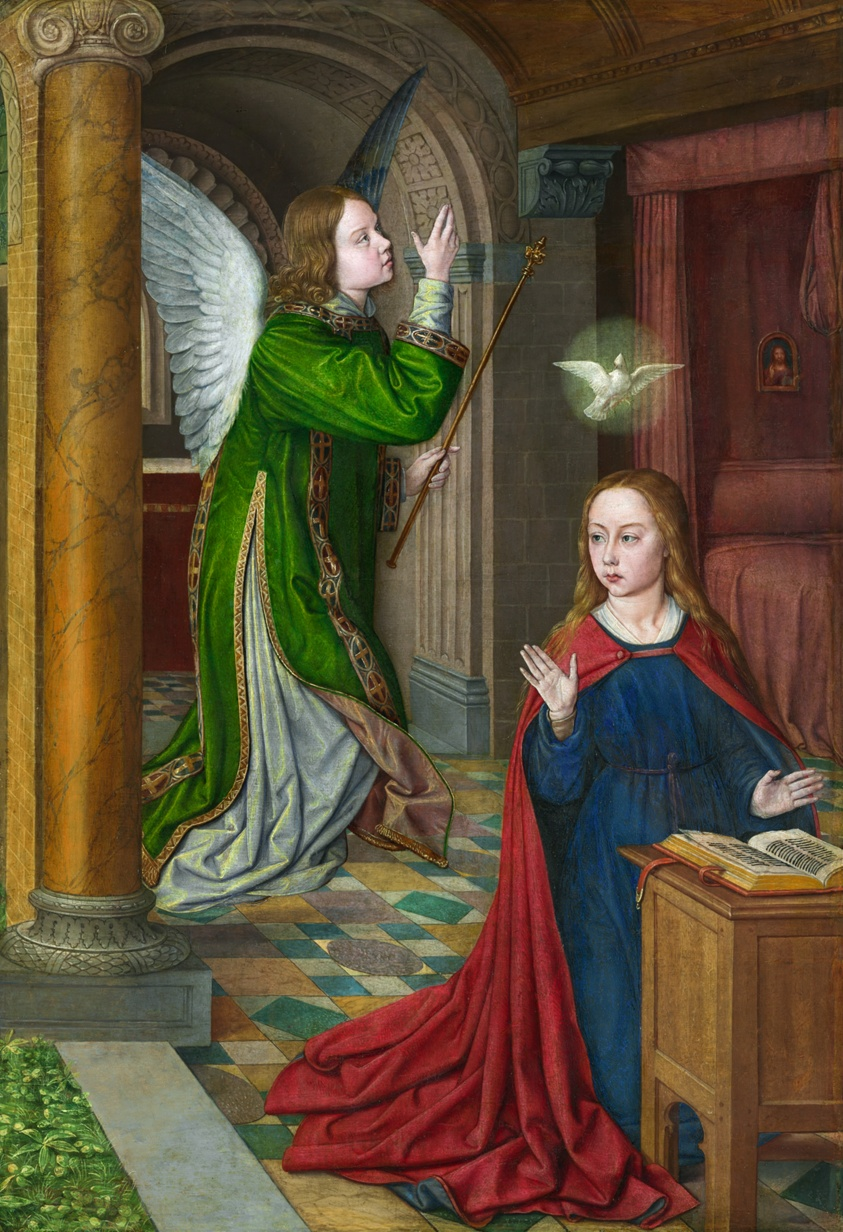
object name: Painting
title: The Annunciation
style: Renaissance, 15th century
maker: Jean Hey (Master of Moulins; Netherlandish, c. 1480-c.1504)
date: 1490–95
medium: Oil on panel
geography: Netherlands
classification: oil on panel; french; oil paintings (visual works); paint; painting; european painting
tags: The Annunciation, architecture, bed, bedrooms, blue (color), green (color), interior, red (color), religious figures, religious scenes, Tile, Virgin Mary, religion, Century of Progress, world's fairs, Chicago World's Fairs, women, angels, bibles, biblical, birds, Christian subjects, Christianity, doves, holy spirit